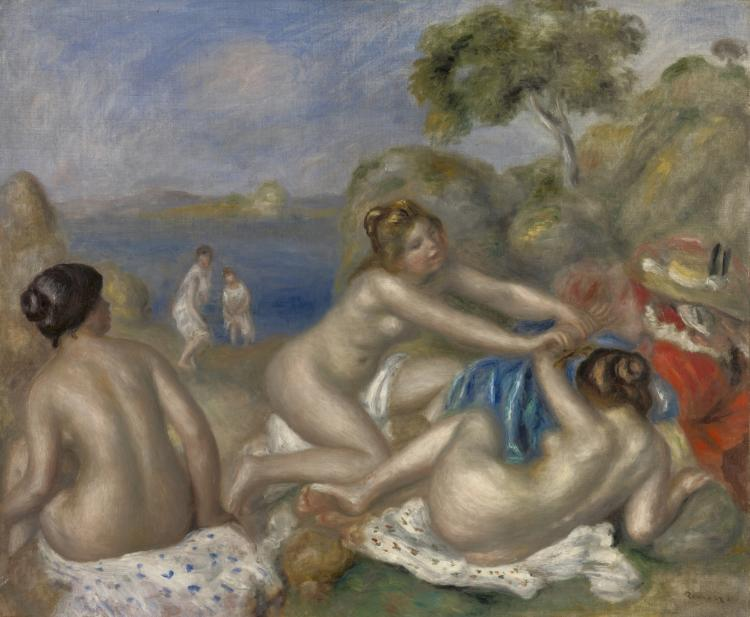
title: Bathers Playing with a Crab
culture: France, 19th century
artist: Pierre-Auguste Renoir (French, 1841–1919)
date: c. 1897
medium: oil on fabric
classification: Painting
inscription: Signed lower right: Renoir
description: After viewing Renaissance paintings on a trip to Italy in 1881, Renoir attempted to bring greater order and stability to Impressionism by merging flickering light effects with solid forms. He conveyed this new ambition in a series of paintings of nude bathers, a subject that preoccupied him from 1883 until his death in 1919. Avant-garde artists of the 20th century admired his ability to blend modernist and classicizing tendencies.